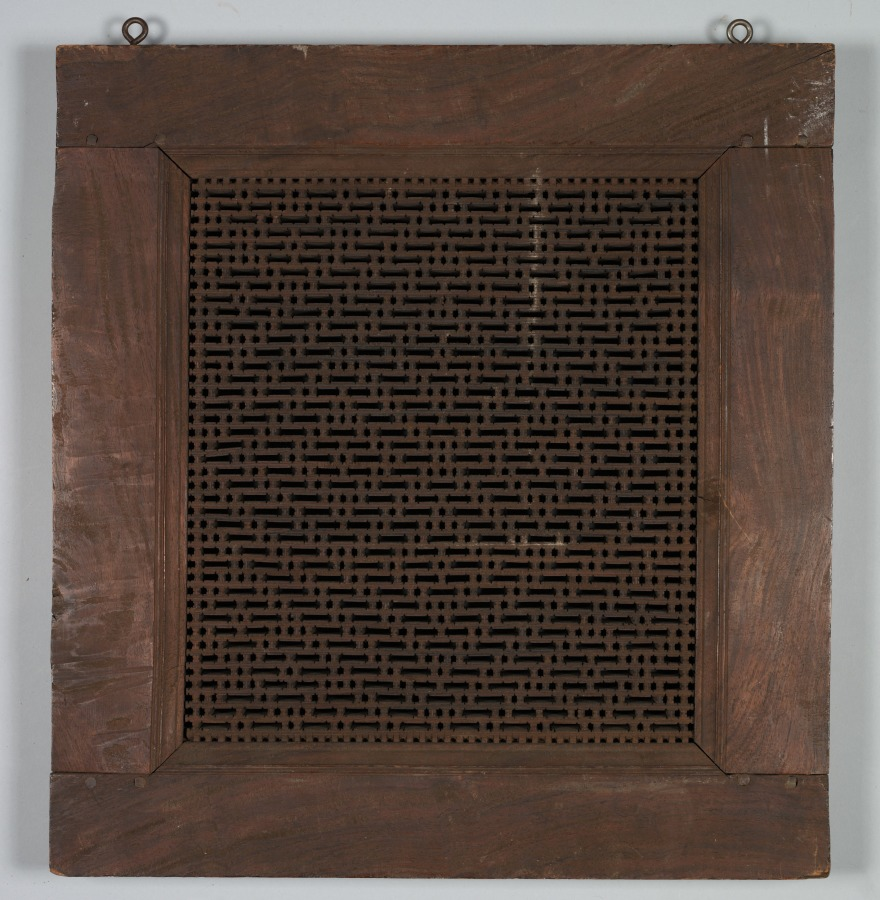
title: Wood Panel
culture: Syria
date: 1800s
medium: wood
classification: Wood